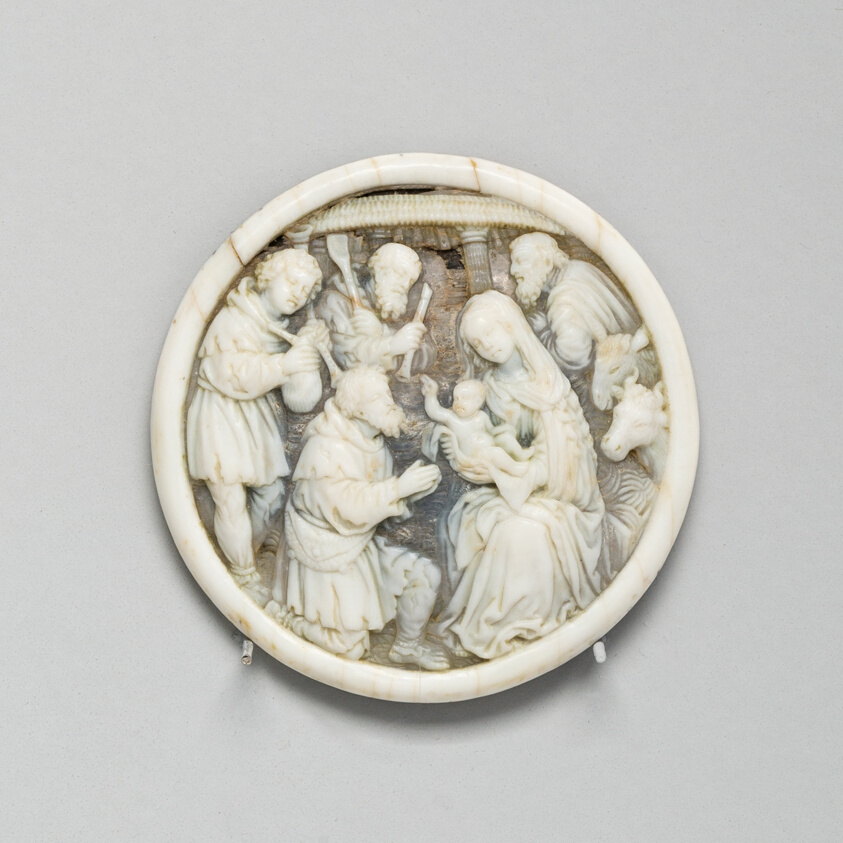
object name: Costume and Accessories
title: Plaque with Adoration of the Shepherds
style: sixteenth century, 16th Century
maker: French; possibly Paris or Southern German; possibly Nuremberg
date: First third of the 16th century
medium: Shell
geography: France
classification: shell; ivory; european decorative arts; costume; french; german; relief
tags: religious scenes, sons, child, fathers, mother, woman, tools, tool, cows, donkeys, Christian subjects, animals, shepherds, Jesus, Madonna and Child, Madonna, Virgin and child/Madonna and child, holy family, religious figures, religious, religion